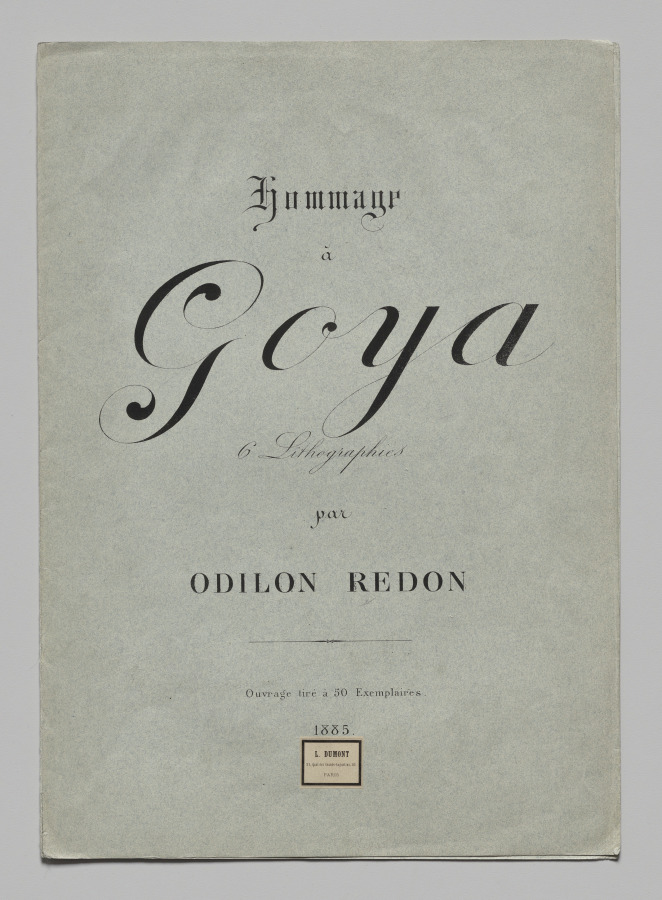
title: Cover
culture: France, 19th century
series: Homage to Goya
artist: Odilon Redon (French, 1840–1916)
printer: Lemercier & Cie.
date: 1885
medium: lithograph on China paper laid on wove paper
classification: Print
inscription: printed above image at center: Planche I.; below image at center: Dans mon rêve, je vis au Ciel un VISAGE DE MYSTÈRE.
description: This series is one of many that Odilon Redon created throughout his career. Nearly two-thirds of his lithographs took the form of portfolios—prints connected conceptually by a theme or narrative and physically by a folder or binding. Such works were often dispersed over time, but Cleveland was fortunate to acquire several complete sets with their original covers during the 1920s. Dating from Redon’s early experimentation with lithography, Homage to Goya was intended as a tribute to 18th-century Spanish master Francisco de Goya, whose interest in dreams and the subconscious influenced Redon. The six seemingly unrelated images celebrate Goya’s ambiguity and collectively suggest the introspection and isolation of artistic practice.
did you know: This portfolio was published in an edition of 50, one of which Redon sent to poet Stéphane Mallarmé soon after Redon became a frequent participant in a literary salon held regularly at Mallarmé's home.